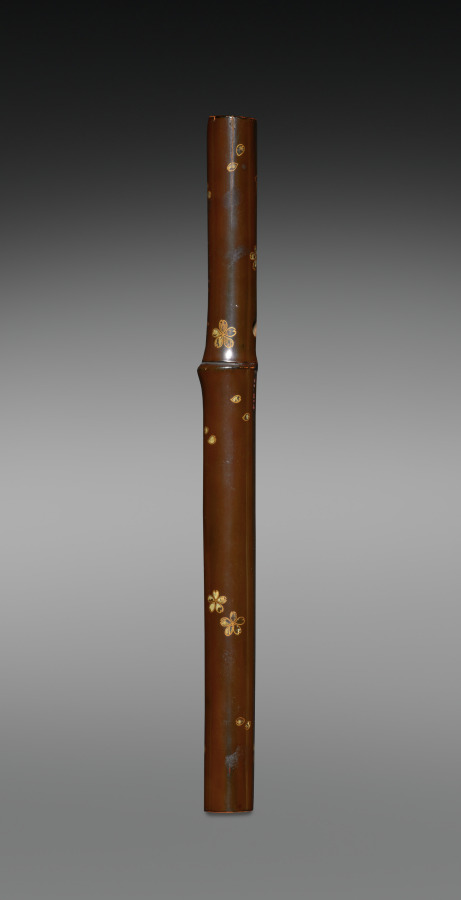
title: End-blown Flute (Hitoyogiri)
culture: Japan, Meiji period (1868–1912)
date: late 1800s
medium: Lacquered bamboo with gold and silver maki-e (sprinkled powder designs)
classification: Musical Instrument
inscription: 篠本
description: The hitoyogiri 一節切 is considered one type of shakuhachi 尺八 bamboo flute and was popular in the 16th and 17th centuries. It is smaller and of weaker sound than the better known fuke 普化, and was thus known as a "small bamboo" or kotake 小竹, during a brief 19th-century revival. The node of the bamboo is positioned between the four finger holes on the front, and the thumb hole at the top of the back. This one has a design of cherry blossoms and scattered petals.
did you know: The name of this flute, hitoyogiri 一節切 comes from the fact that it has a single node in the bamboo from which it is made.